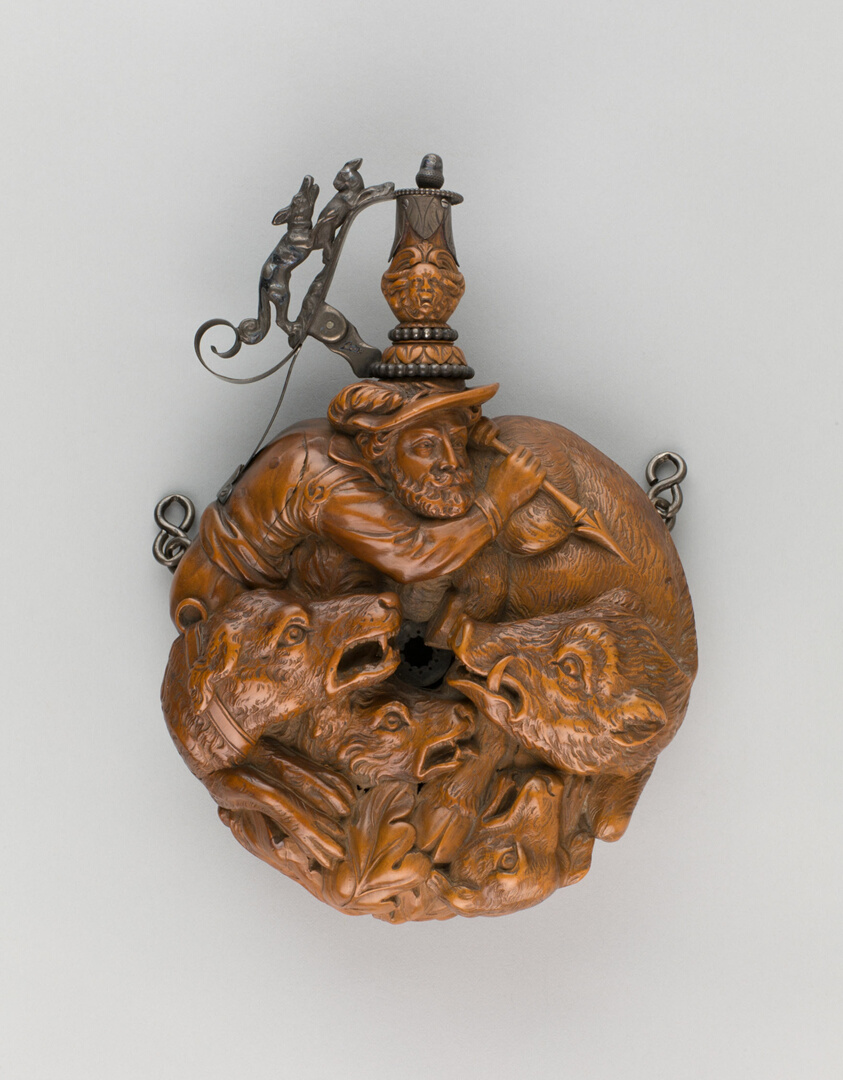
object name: Arms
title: Powder Flask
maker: Johann Georg Maucher (workshop); German, Schwäbisch Gmünd, active 1650-1700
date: c. 1650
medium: silver and pearwood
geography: Germany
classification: firearm-accessory; arms; arms and armor